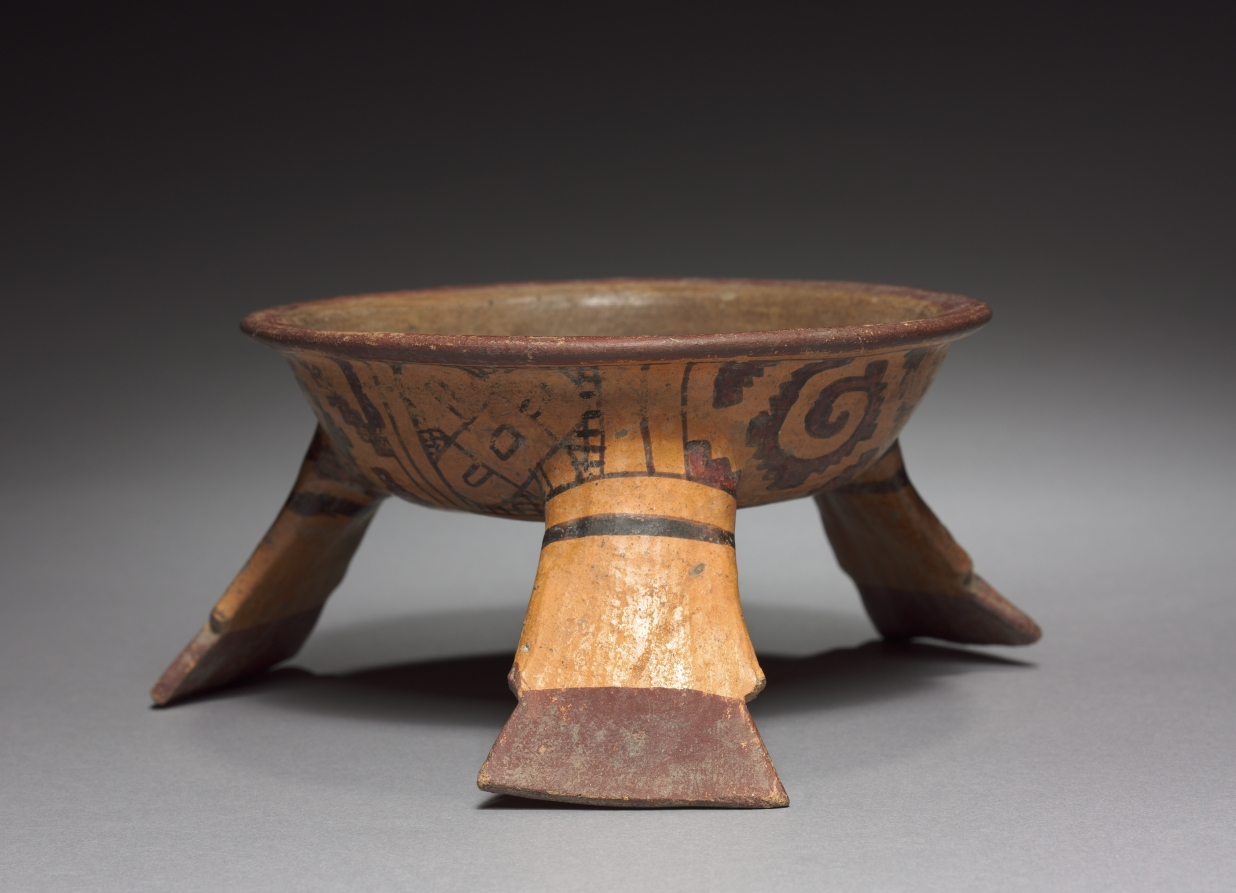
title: Tripod Bowl with Painted Underside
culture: Mexico, Oaxaca, Mixtec, 13th-16th century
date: 1200–1519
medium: pottery with burnished, colored slips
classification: Ceramic